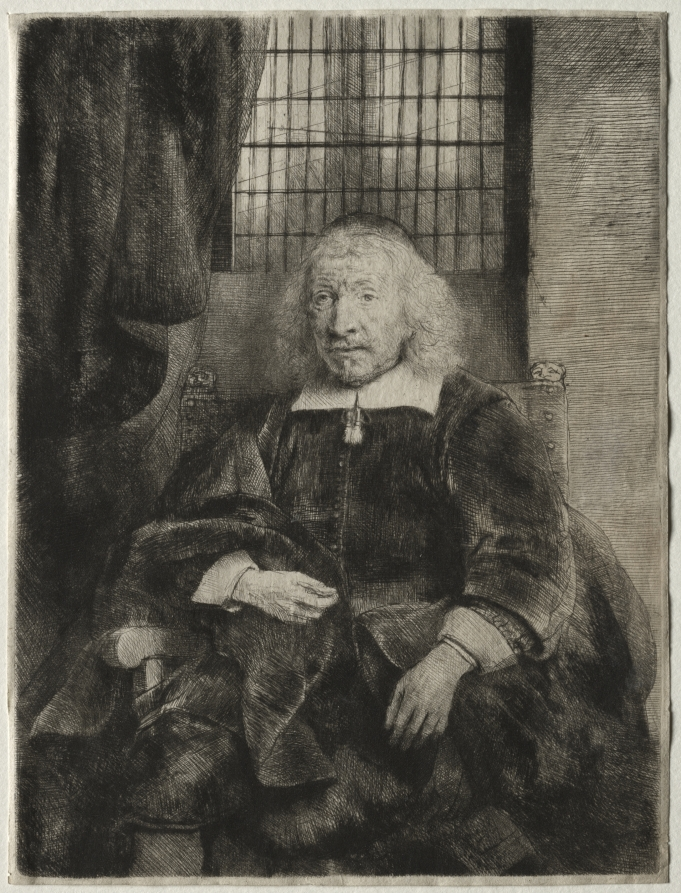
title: Thomas Haaringh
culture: Netherlands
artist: Rembrandt van Rijn (Dutch, 1606–1669)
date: c. 1655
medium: etching and drypoint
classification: Print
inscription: VERSO, lower center, in graphite: D 261 ; lower center, in graphite: B. 274 II ; lower right, in graphite: C 582/C 1541